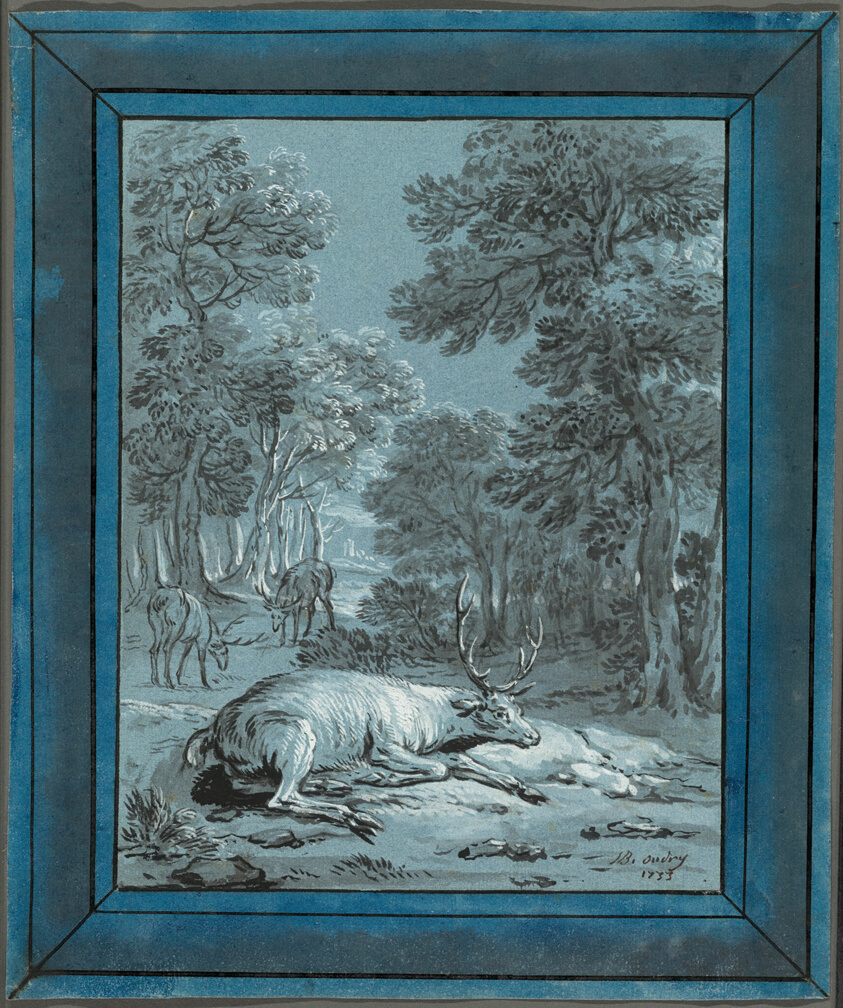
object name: Drawing and Watercolor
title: The Sick Stag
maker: Jean-Baptiste Oudry (French, 1686-1755)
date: 1733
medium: Brush and black and gray ink and gray wash, heightened with white gouache, on blue laid paper, with border in pen and black ink and brush and blue and gray wash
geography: France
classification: brush and ink; drawings (visual works); prints and drawing